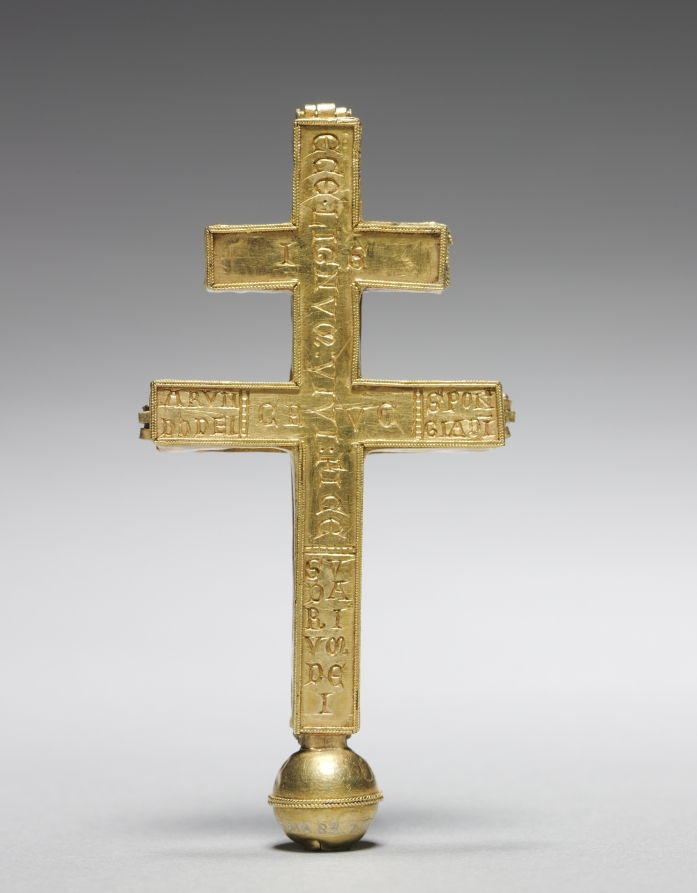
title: Double-Arm Reliquary Cross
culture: Latin Kingdom of Jerusalem, Jerusalem, Gothic period, 12th century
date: c. 1100–1200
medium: gold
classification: Metalwork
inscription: inscribed on center front: ECE: LIGNUM: VIVI: CRUCIS: FICE; at base: SUDARIUM DEI; at each end of main arm: ARUNDO DEI SPONGIA DEI. (Behold the Glorius Wood of the Living Cross: Sudarium of the Lord: Staff of the Lord: Sponge of the Lord).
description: This elegant double-arm cross once contained fragments of four of the most important relics of Christ’s Passion, namely a portion of the True Cross, a piece of Christ’s sudarium (sweat cloth), and fragments of the reed staff and sponge used by Christ’s tormentors to mock him and give him vinegar for his thirst during the Crucifixion. The identity of these relics and their placement in the cross are indicated by open cavities on the reliquary’s front and accompanying Latin inscriptions on its back.